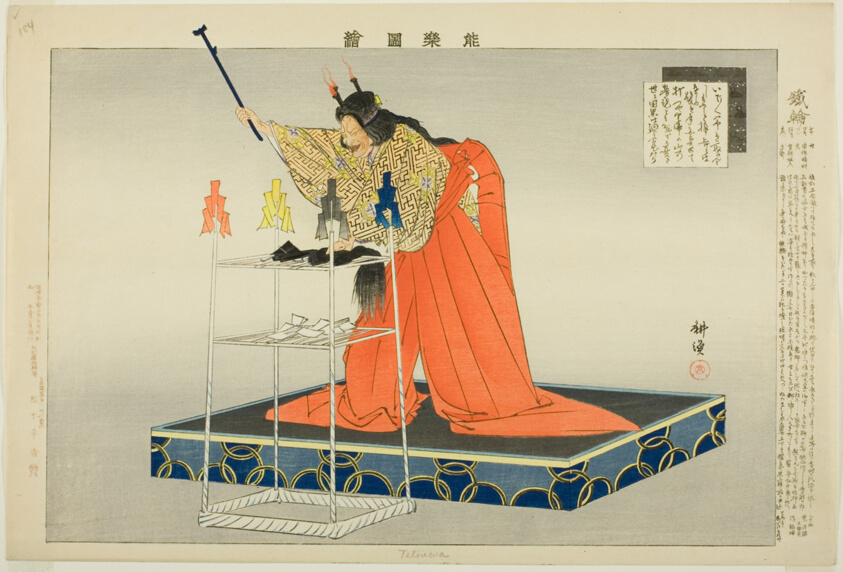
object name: Print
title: Tetsuwa or Kanawa, from the series "Pictures of No Performances (Nogaku Zue)"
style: Japanese (culture or style)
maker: Tsukioka Kogyo; Japanese, 1869-1927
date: 1898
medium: Color woodblock print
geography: Japan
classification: woodblock print; print; asian art